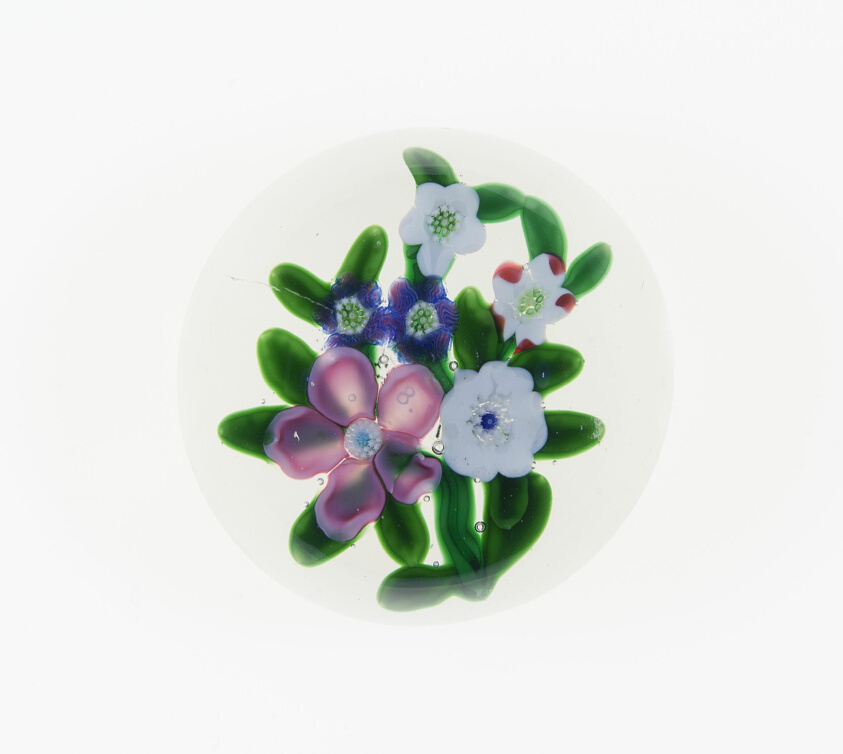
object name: Glass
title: Paperweight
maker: Clichy Glassworks (Cristalleries de Clichy); Clichy, France, 1837-1885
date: c. 1848–55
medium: Glass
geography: Clichy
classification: paperweight; lampwork; european decorative arts; glass